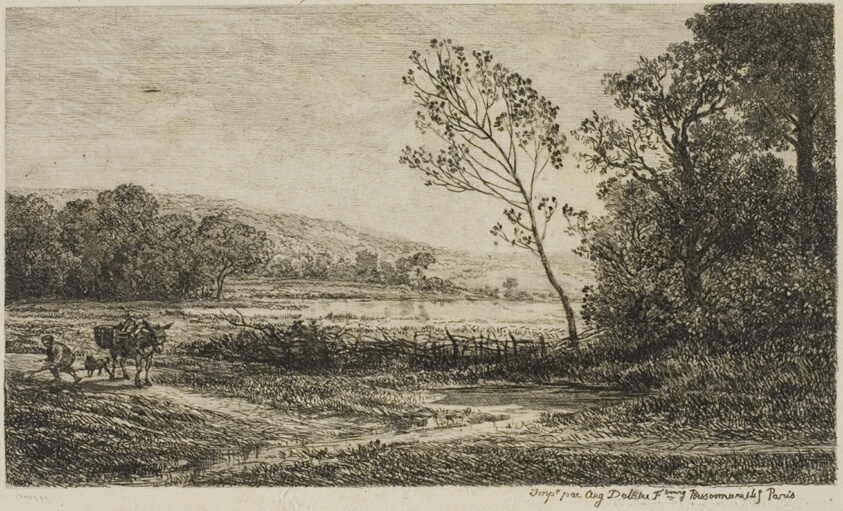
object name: Print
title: Autumn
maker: Charles François Daubigny (French, 1817-1878)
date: 1848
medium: Etching on cream Japanese paper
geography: France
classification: etching; print; prints and drawing